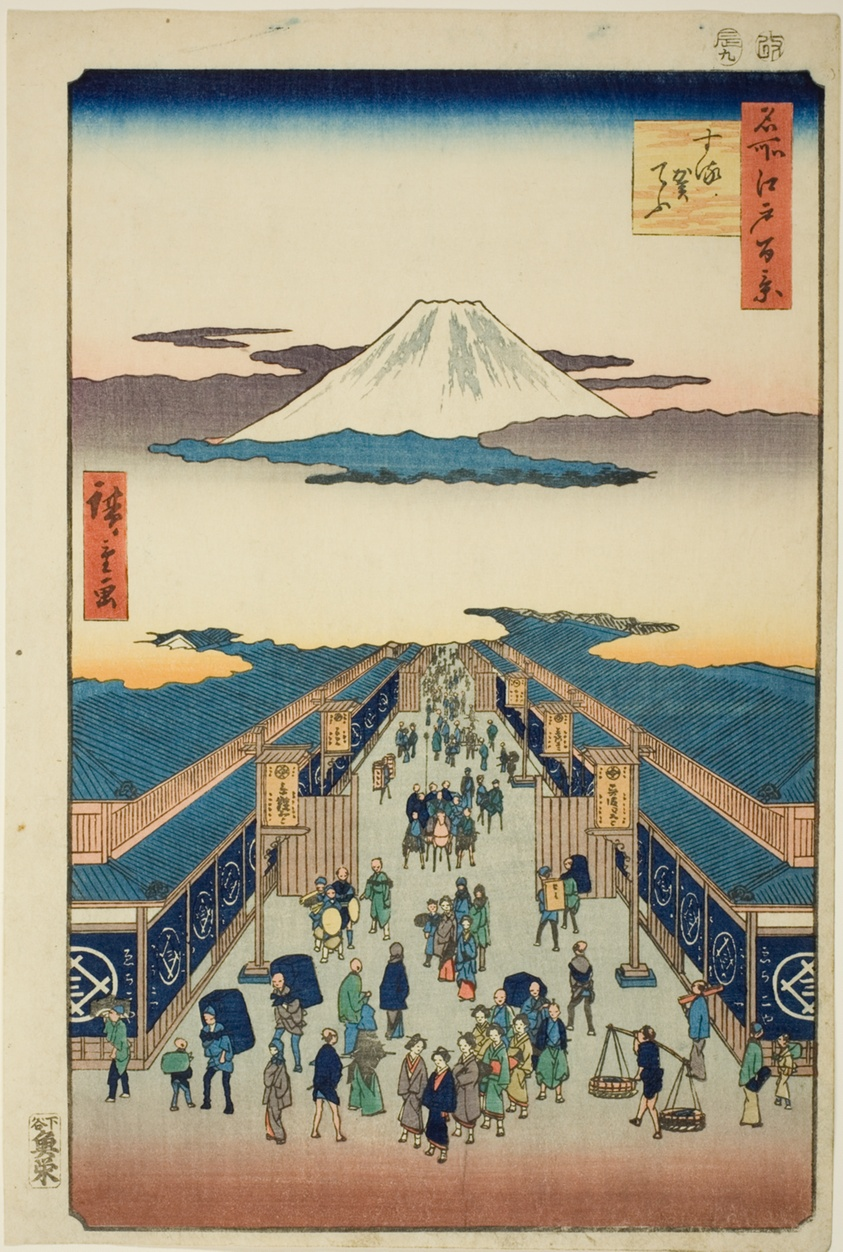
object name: Print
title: Surugacho, from the series "One Hundred Famous Views of Edo (Meisho Edo hyakkei)"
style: Japanese (culture or style)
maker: Utagawa Hiroshige 歌川 広重; Japanese, 1797-1858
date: 1856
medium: Color woodblock print; ōban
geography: Japan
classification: woodblock print; print; asian art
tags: landscapes